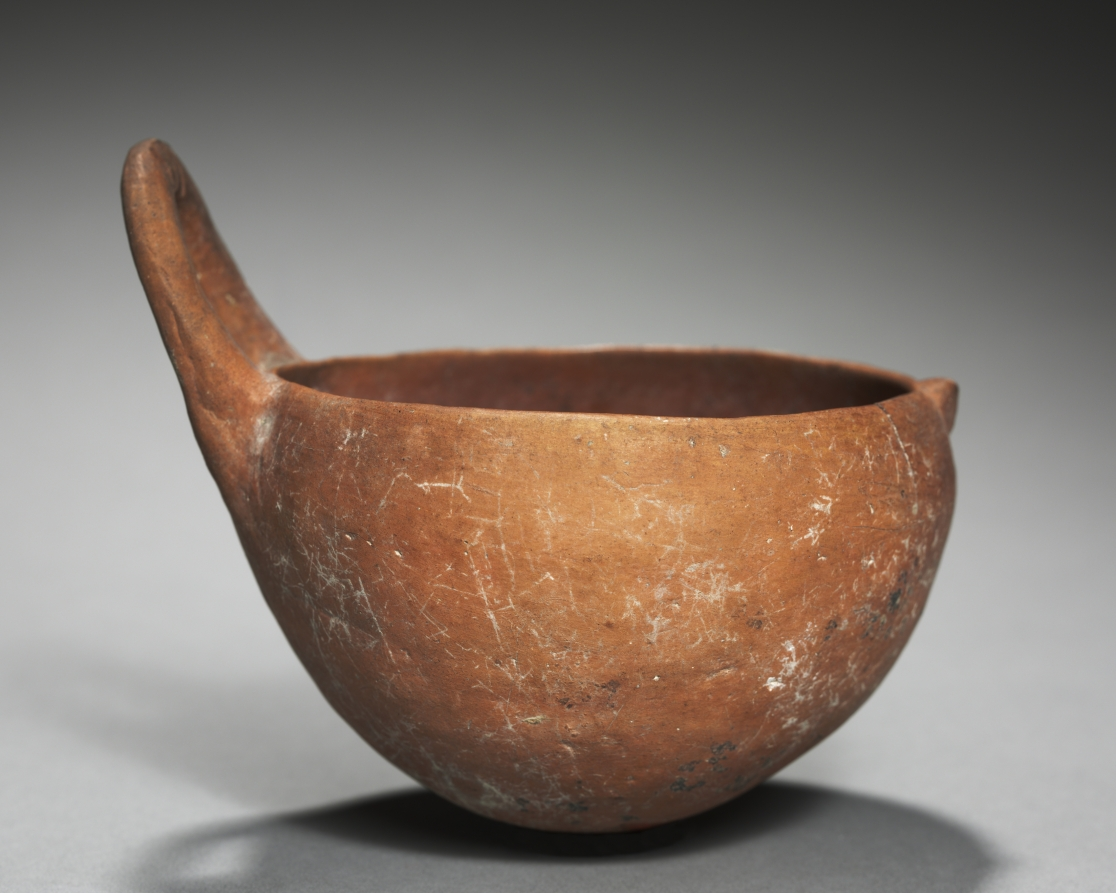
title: One-Handled Bowl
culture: Cyprus, early Cypriot III-middle Cypriot II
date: c. 2000–1725 BCE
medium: red ware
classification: Ceramic